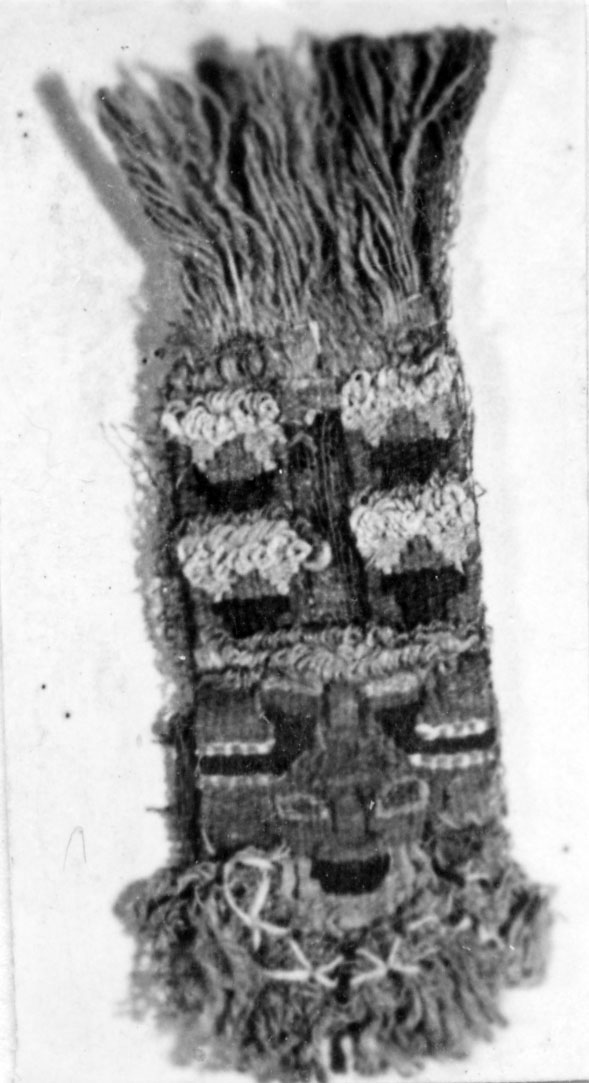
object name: Textile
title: Patch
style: lambayeque, nazca, early intermediate period, Pre-Columbian, americas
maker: Lambayeque (Probably north coast, Peru)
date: A.D. 1000/1476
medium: Tapestry and loop weaving. Simple Cloth, slit tapestry.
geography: Peru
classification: textile; weaving